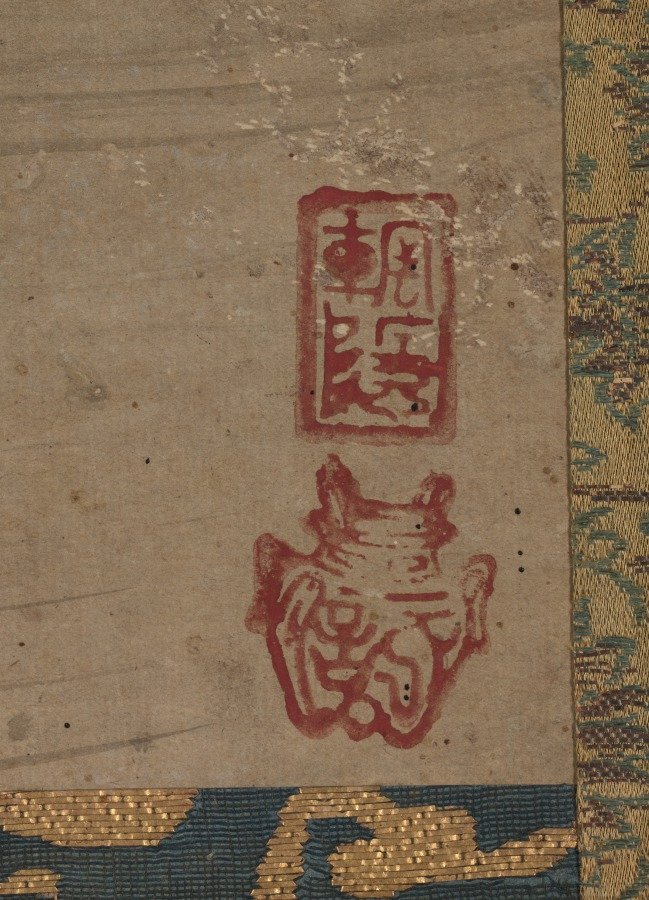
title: Immortal Riding on a Carp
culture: Japan, Edo period (1615–1868)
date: c. 1600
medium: hanging scroll; ink on paper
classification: Painting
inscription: seal of Motonobu ?